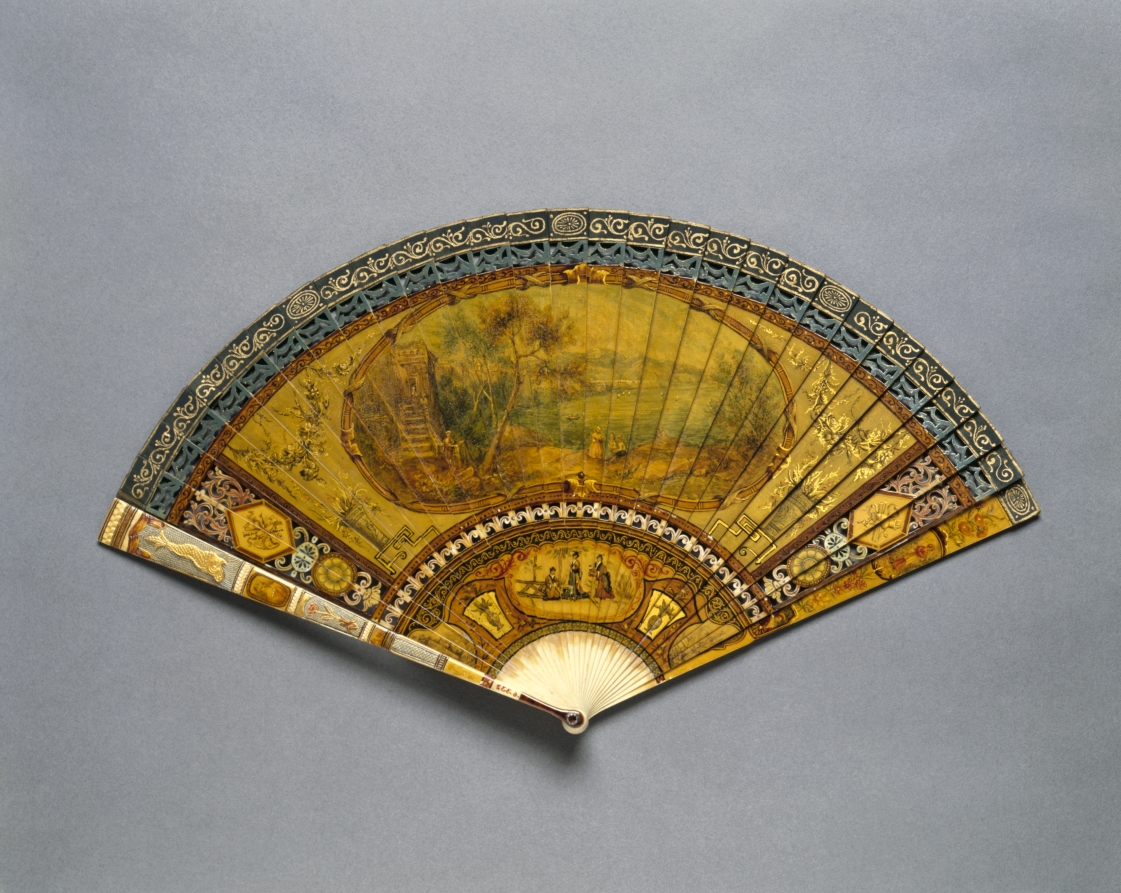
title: Fan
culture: France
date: c. 1888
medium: wooden frame painted and lacquered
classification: Miscellaneous